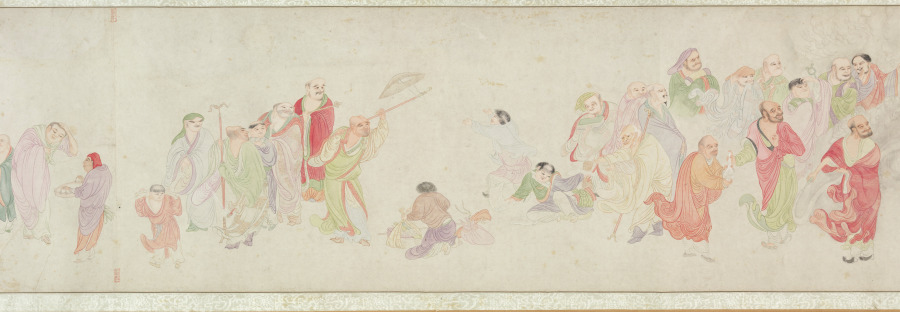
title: The Five Hundred Arhats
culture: China, Ming dynasty (1368–1644)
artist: Wu Bin (Chinese, active c. 1591–1626)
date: 1591–1626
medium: Handscroll; ink and color on paper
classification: Painting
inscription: 枝隱頭陀吳彬齋心拜寫 [印]吳彬之印; 文中父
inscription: 7 seals of Qianlong emperor (r. 1736–95): Gu xi tian zi 古希天子; Shou 壽; Qianlong jian shang 乾隆鑑賞; San xi tang jing jian xi 三希堂精鑑璽; Yi zi sun 宜子孫; Tai shang huang di zhi bao 太上皇帝之寳; Qian qing gong bao 乾清宮寶.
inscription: 6 seals of Cheng Qi 程琦 (1911–1988): Ke an geng zi wu shi yi hou suo de ming ji 可菴庚子五十以後所得名跡; 5 other Cheng Qi seals.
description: More than 66 feet long, this handscroll depicts 447 luohans, 72 attendants, and the bodhisattva of compassion at its very end. Luohans (arhats in Sanskrit), disciples of the Buddha and protectors of the Buddha’s law, possess supernatural powers and take on myriad external appearances. The amusing assortment of characters are engaged in an array of religious, secular, and miraculous activities. The painter used stylistic features borrowed from earlier artists, carefully controlled lines, and refined coloring. Wu Bin was a lay Buddhist and depicting this sort of image was part of a religious practice seeking understanding of the Buddha’s teaching.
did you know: Far advanced on the path to enlightenment, arhats have the capacity to tame tigers, free dragons, and to float on water or in the air.